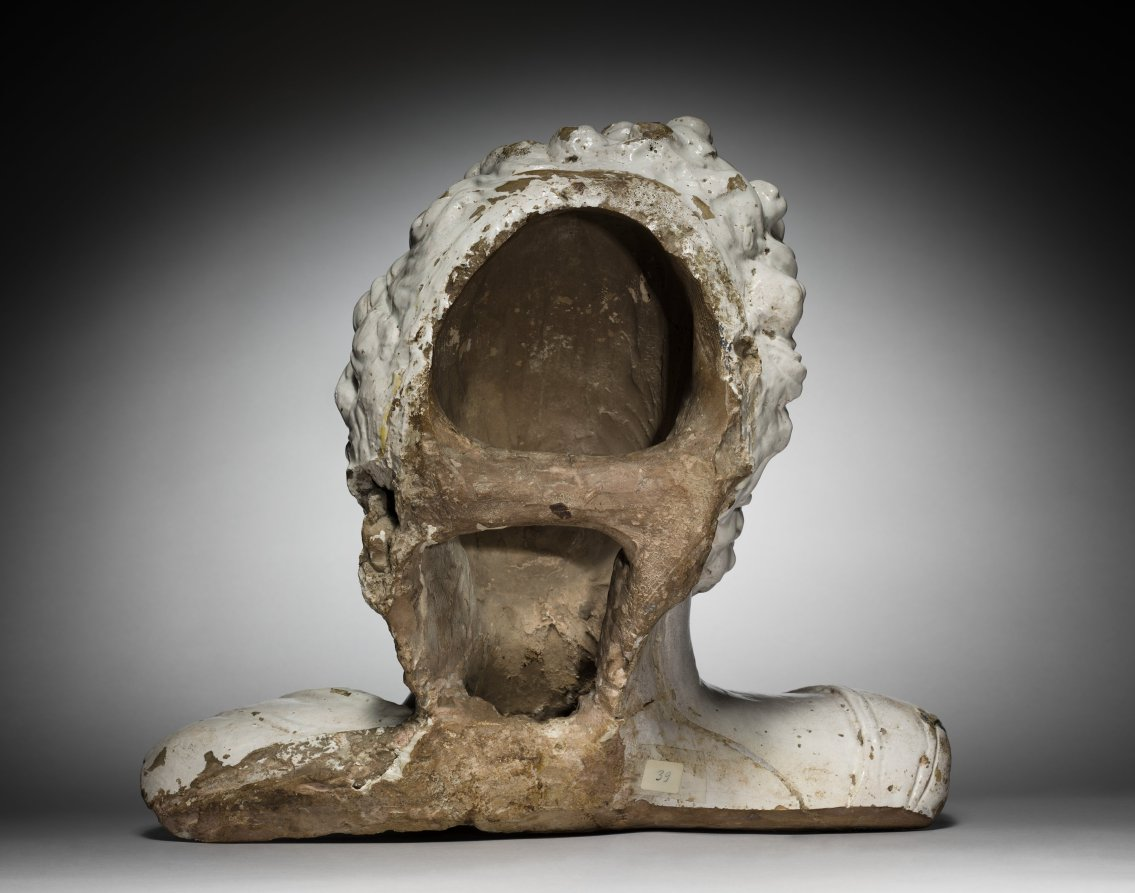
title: Bust of a Classical Hero or Emperor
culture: Italy, 16th century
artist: Girolamo della Robbia (Italian, 1488–1566)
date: early to mid 16th century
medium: glazed terracotta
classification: Sculpture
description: This bust most likely represents an emperor or condottiere from classical antiquity, and probably formed part of a series of classical heads. Such groups of worthies were featured as decorative schemes in the studioli and architectural projects of Renaissance statesmen. Attesting to the sophistication of their learned patrons, these busts also provided the opportunity for artists to explore the contemporary stylistic relevance of classical portraiture—a source of fascination and inspiration for Florentine sculptors of this period.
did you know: Head-and-shoulders portraits, known as busts, were popular from Roman times.